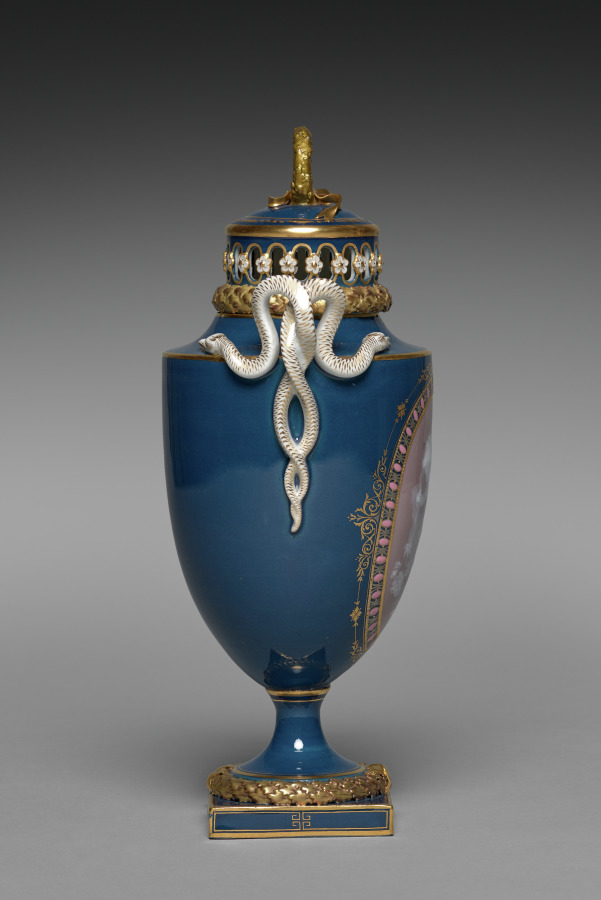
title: Covered Vase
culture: Germany, 19th century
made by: Meissen Porcelain Factory (German, est. c. 1710)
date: 1881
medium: porcelain with pâte-sur-pâte decoration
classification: Ceramic